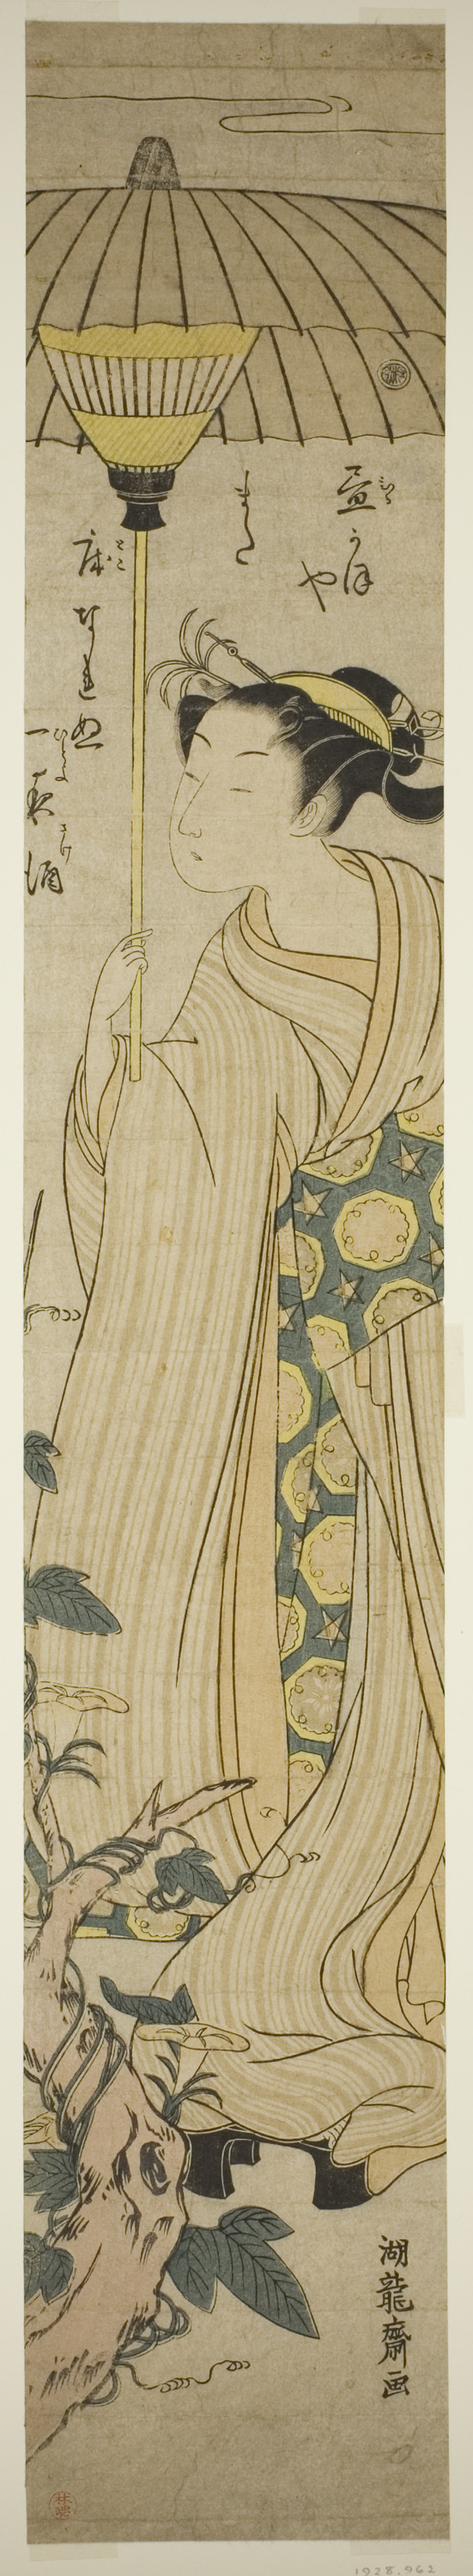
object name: Print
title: Young Woman Holding Parasol Admires Hirugao (noon-face) Flowers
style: Japanese (culture or style)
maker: Isoda Koryusai (Japanese, 1735-1790)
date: c. 1772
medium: Color woodblock print; hashira-e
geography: Japan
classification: woodblock print; print; asian art